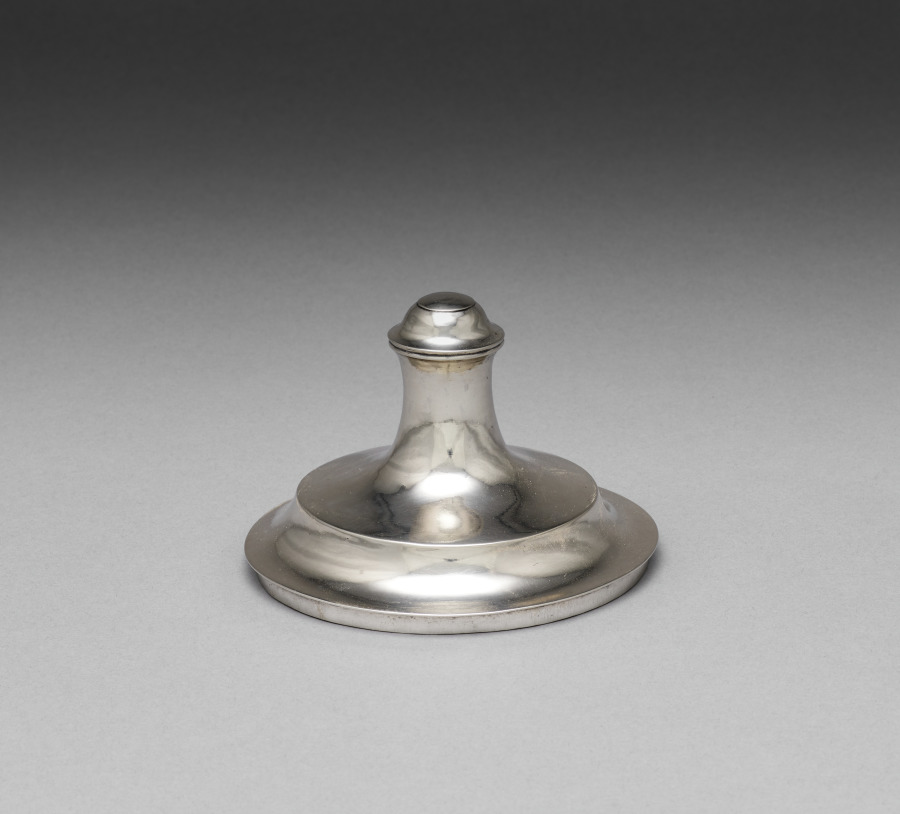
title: Cover for a Sugar Bowl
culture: America, Pennsylvania, Philadelphia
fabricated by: William Haverstick (American, 1756–1823)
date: c. 1800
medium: silver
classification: Silver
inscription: engraved "MP" in bright-cut script on body.